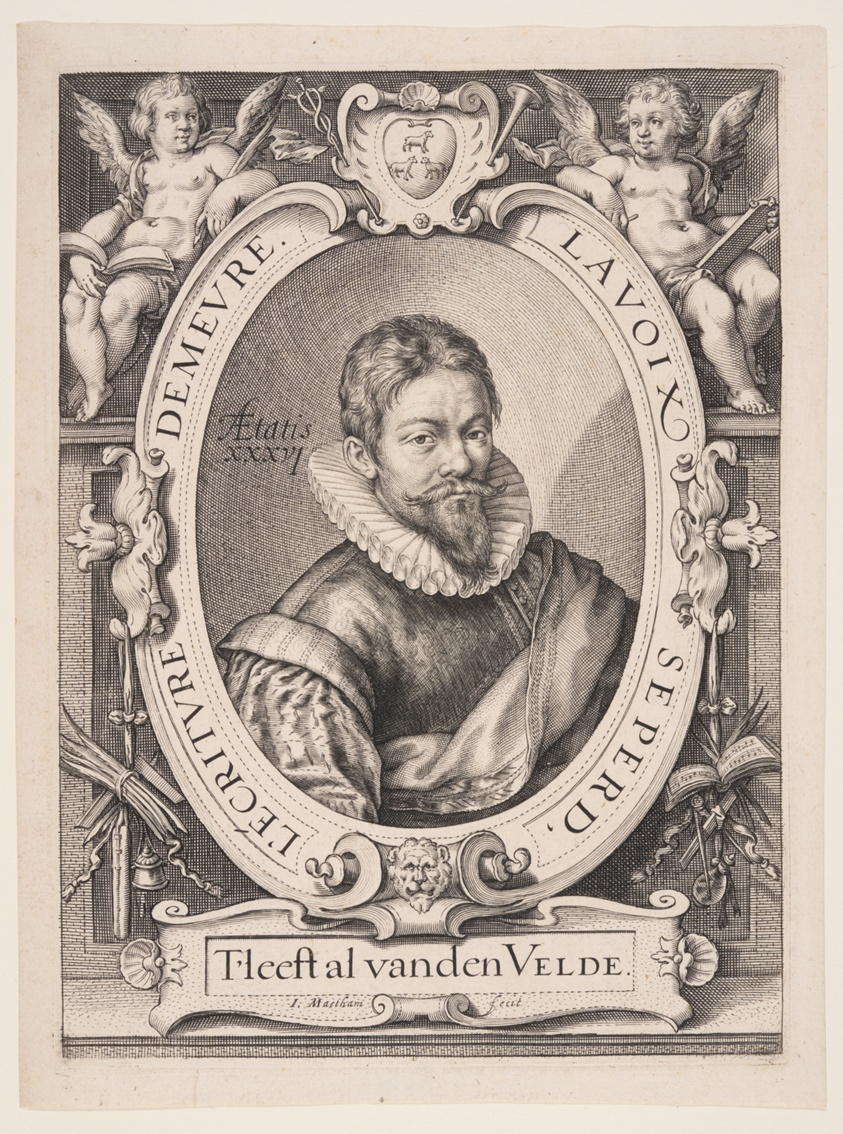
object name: Print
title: Jan van de Velde the Elder, Calligrapher in Haarlem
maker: Jacob Matham (Dutch, 1571–1631)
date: c. 1604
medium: Engraving on laid paper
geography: Netherlands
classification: print; engraving; paper; prints and drawing